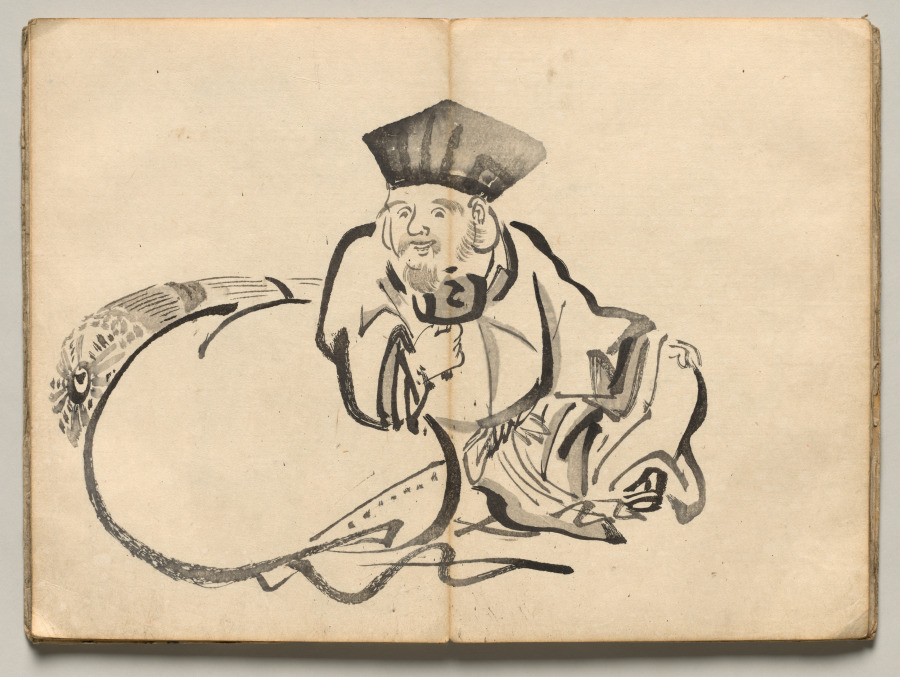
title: Daikoku from Ōkyo Picture Book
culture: Japan, Edo period (1615–1868)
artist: after Maruyama Ōkyo (Japanese, 1733–1795)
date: 1850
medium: accordion-style woodblock printed folding-book; ink and color on paper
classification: Bound Volume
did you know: This impression of a book of woodblock-printed designs is missing a spread that depicts a crane.